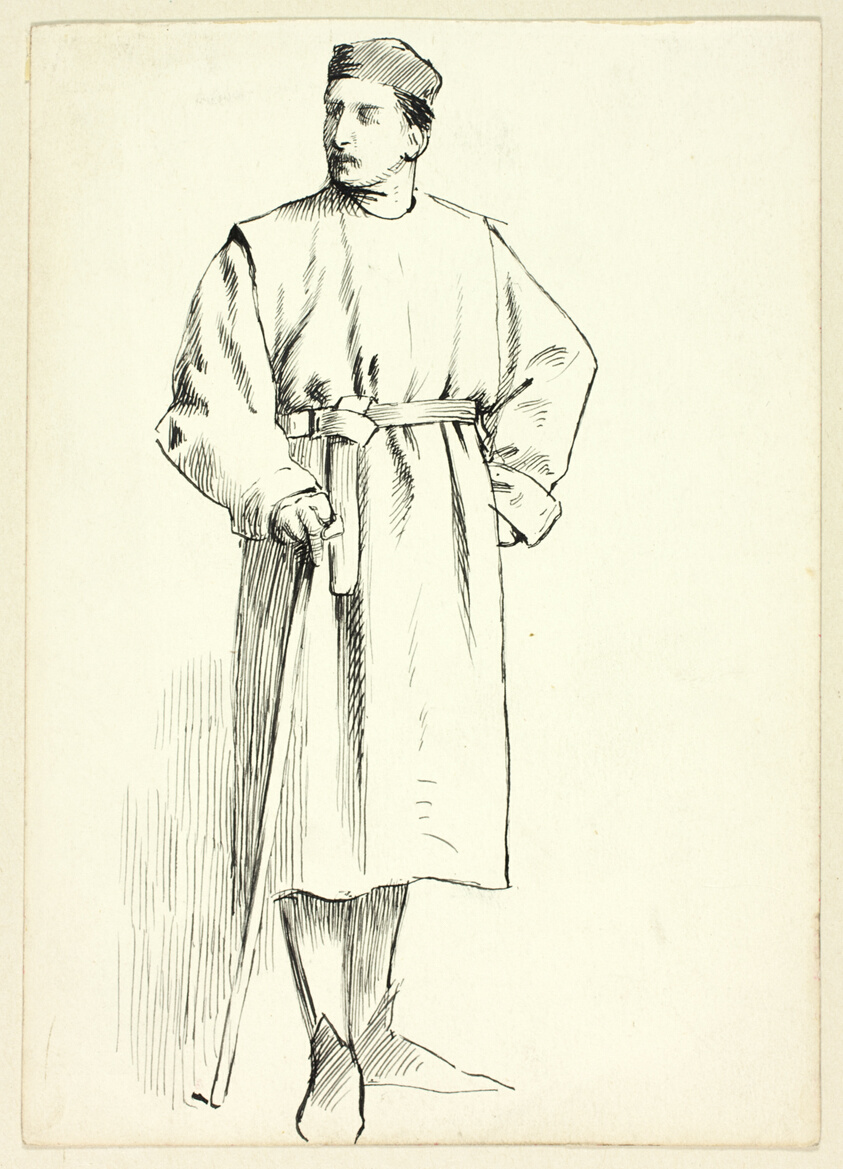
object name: Drawing and Watercolor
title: Standing Man Holding Stick, Hand on Hip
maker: Henry Stacy Marks (English, 1829-1898)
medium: Pen and black ink on ivory wove paper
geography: England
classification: pen and ink drawings; drawings (visual works); prints and drawing